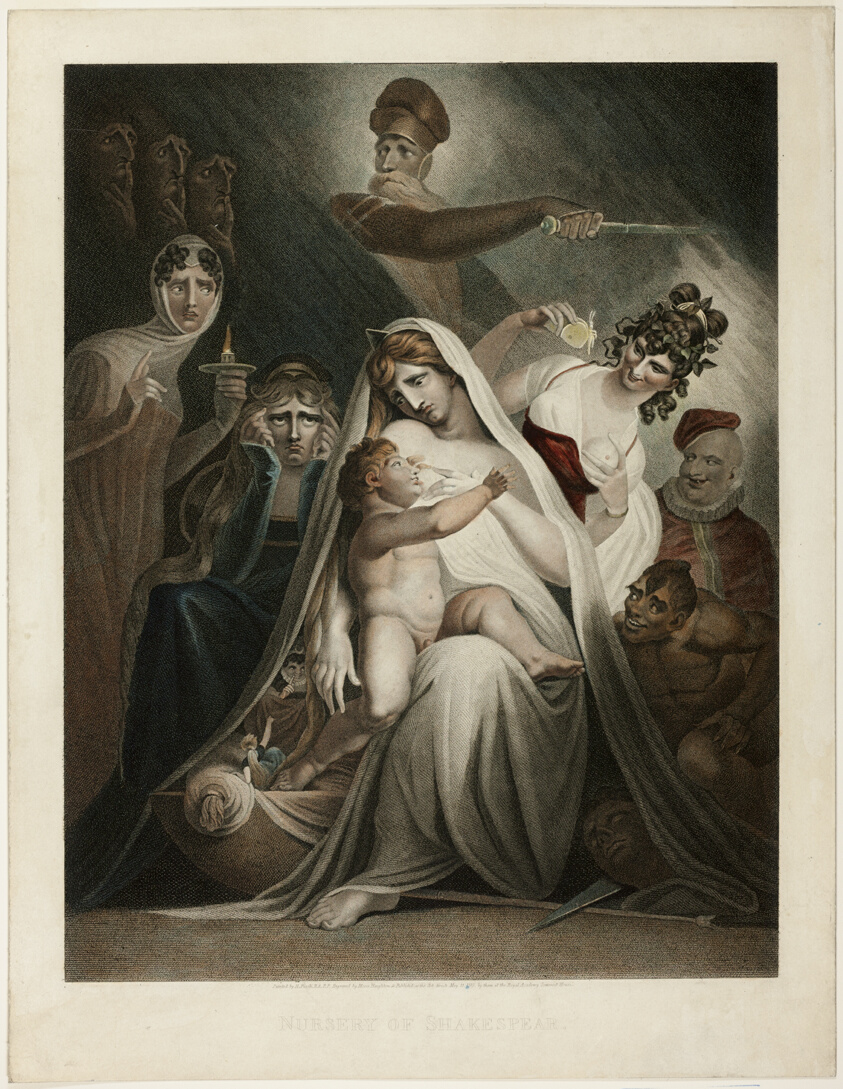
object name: Print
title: The Nursery of Shakespeare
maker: Moses Haughton II (English, 1772/74-1848); after Henry Fuseli (Swiss, active in England, 1741-1825)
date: 1810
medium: Stipple engraving, with hand-coloring, on cream wove paper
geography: England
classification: engraving; print; prints and drawing